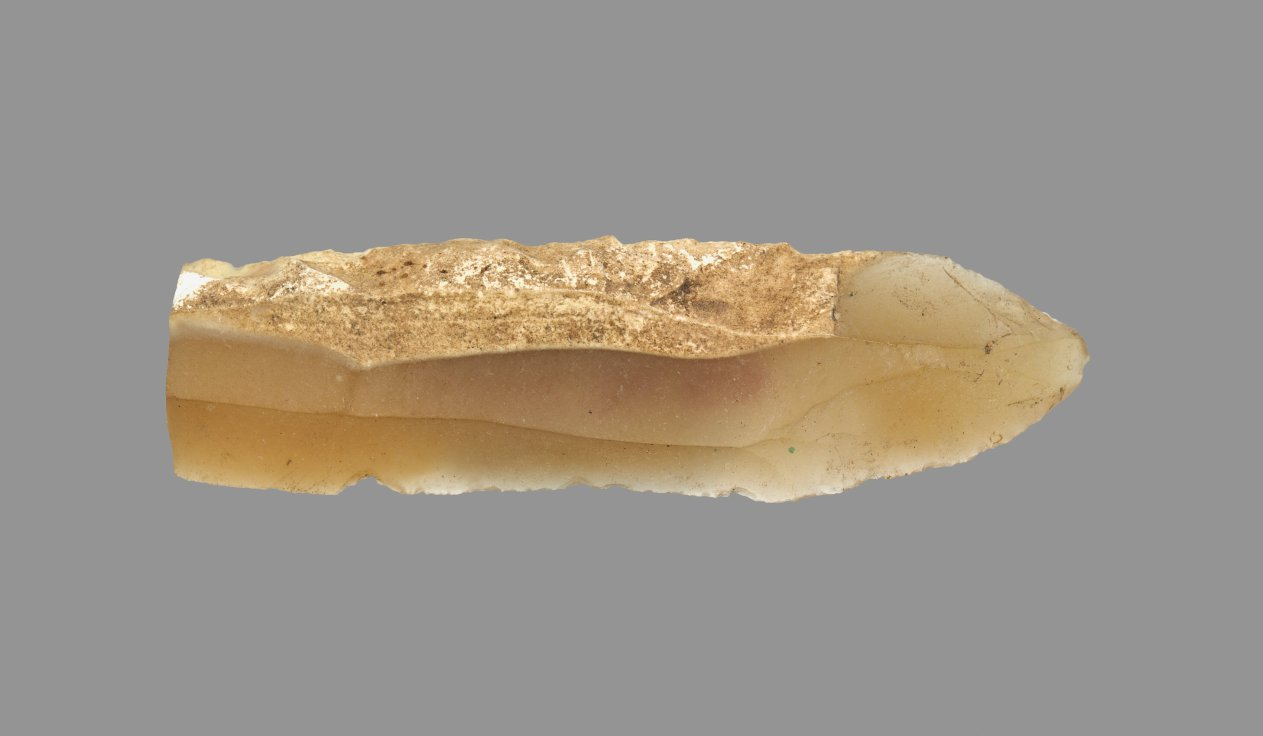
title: Sickle Blade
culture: Egypt, Middle Kingdom (2040–1648 BCE), Dynasty 12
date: 1980–1801 BCE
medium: flint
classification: Implements